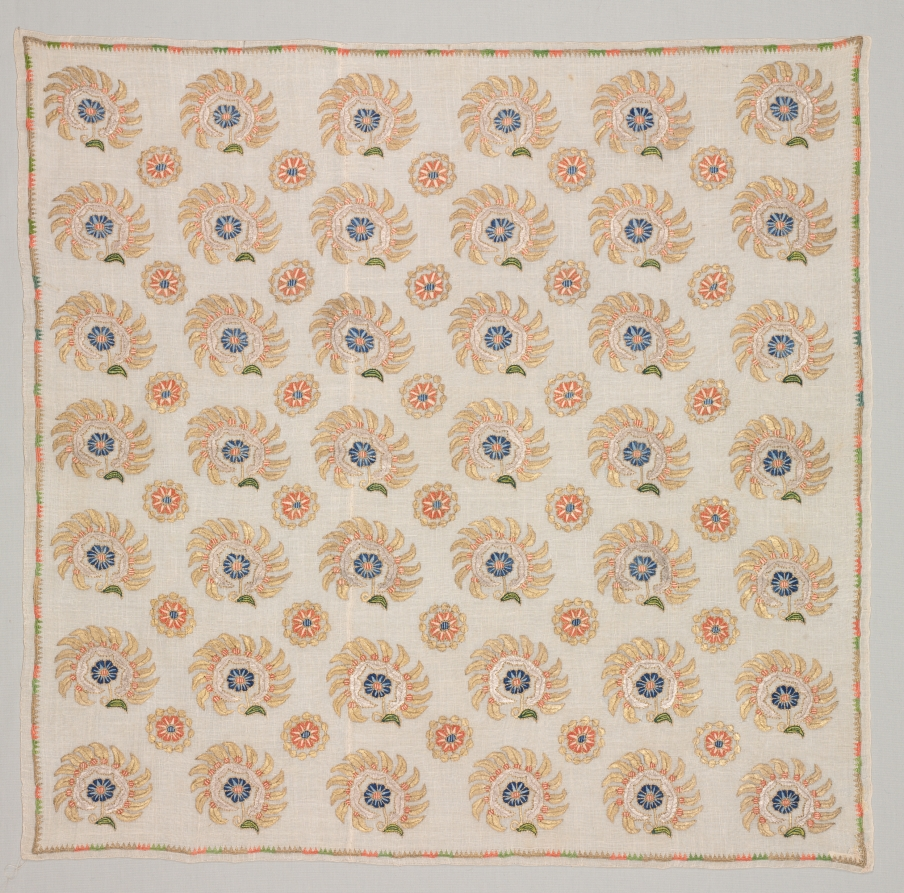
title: Embroidered Square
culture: Turkey, 19th century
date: 19th century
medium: embroidery: silk, gold and silver filé on linen tabby ground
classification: Embroidery